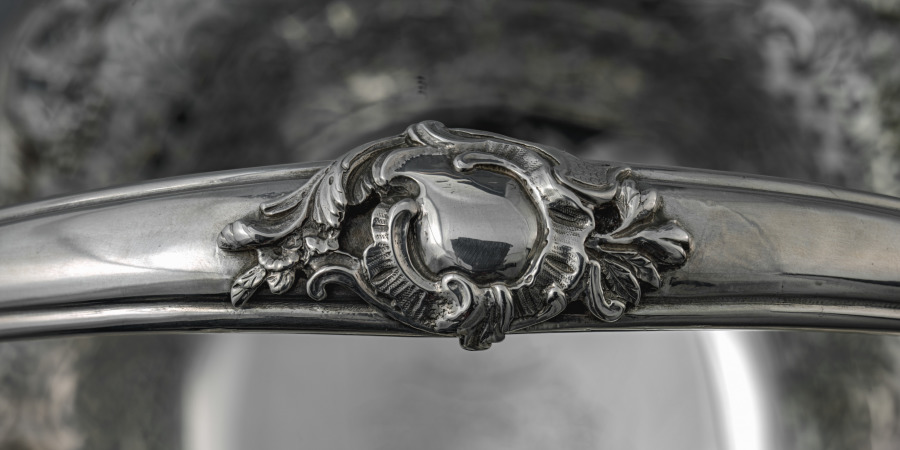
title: Cake Basket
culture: Britain, London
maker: Samuel Herbert and Company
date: 1753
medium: Silver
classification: Silver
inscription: “H/I I”; hallmark for London, George II, Samuel Herbert and Henry Bailey, and date 1753.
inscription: “To/H.H.M./from/S.K., E.W.G., J.H.J., D.R.L., M.B.R./on the occasion of his/Silver Wedding/1911-1936”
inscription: “50-2”; hallmark for London, George II, Samuel Herbert and Henry Bailey, and date 1753.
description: Drinking tea at the end of the day, accompanied by sweet cakes and savory delights, became an established ritual in Britain at all levels of society during the 1700s. In grand houses, silver teapots, caddies, and cake baskets elevated this afternoon refreshment to a formal gathering.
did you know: Sheaves of wheat adorning the rim of this basket allude to the flour used in pastries and cakes for tea.